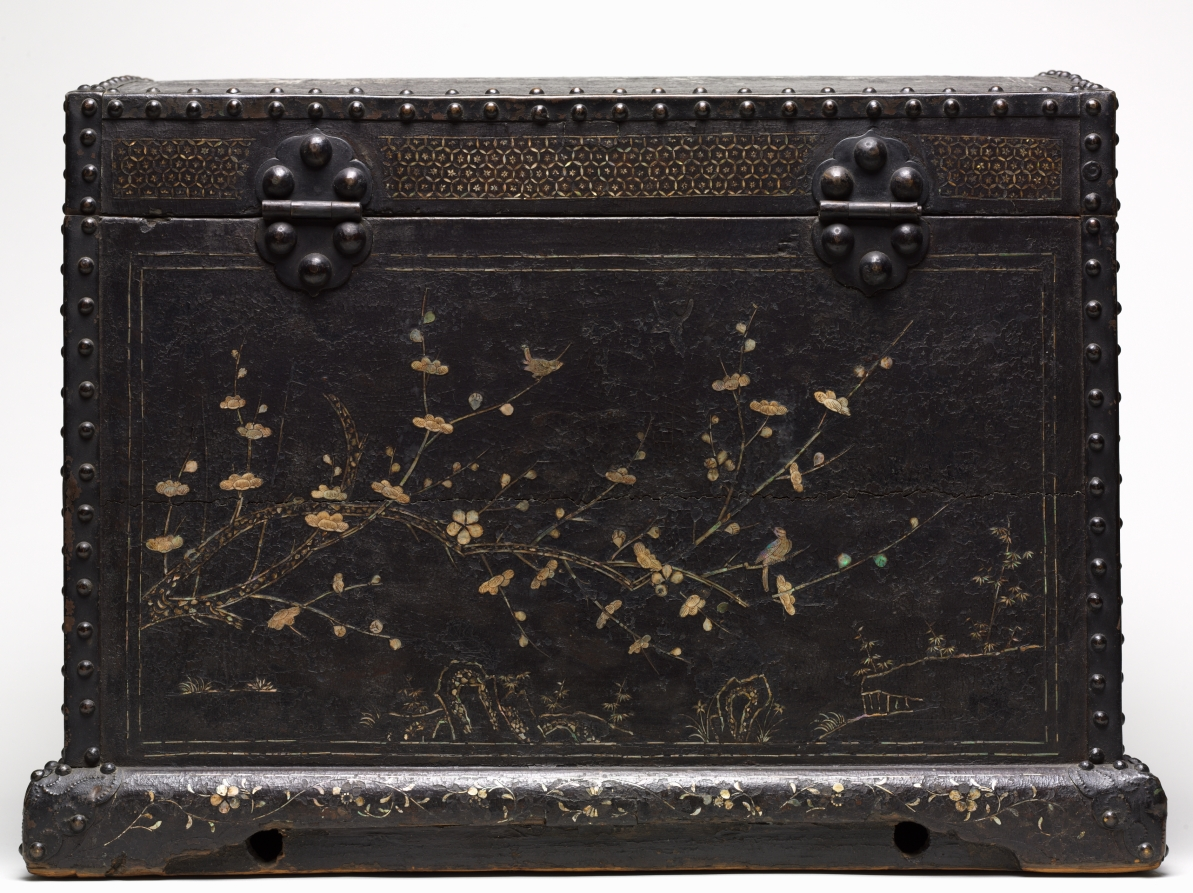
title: Chest for Storing Garments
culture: China, Ming dynasty (1368–1644)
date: 1400s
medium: lacquered wood with mother-of-pearl inlay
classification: Lacquer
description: This precious lacquer box is decorated with bird and plant motifs and figures in mother-of-pearl inlay. The decoration depicts the leisurely pursuit of scholars in nature and a garden setting. Scholars play the board game weiqi, have philosophical conversations, pluck a qin (a zither-like instrument with strings), and read books. Lacquer chests of this type were used to store garments neatly folded along their straight seams. The mother-of-pearl inlay from shells is a technique that was typically practiced by craftsmen in Hangzhou and other parts of southeast China near the sea.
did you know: Lacquer chests of this type were used to store garments.